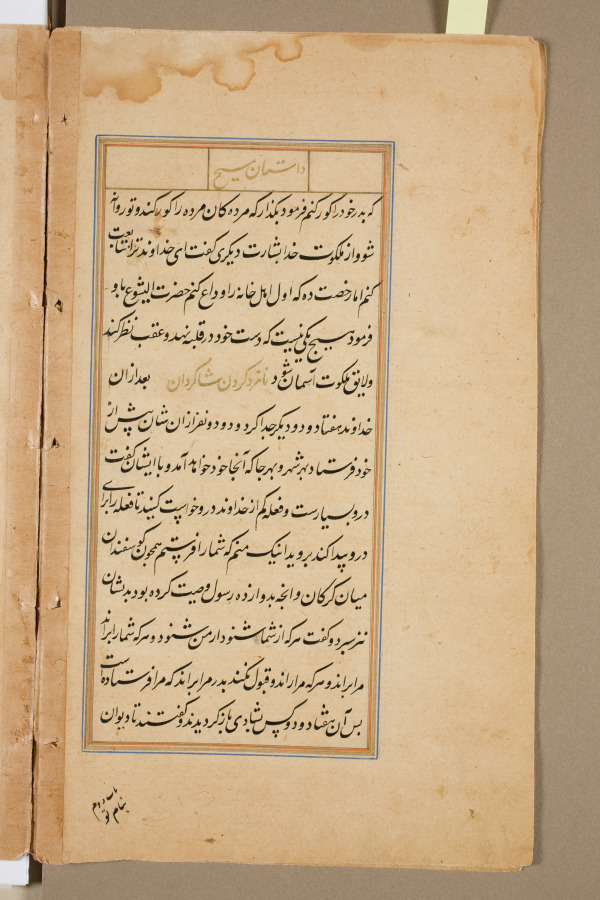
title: Text page from a Mirror of Holiness (Mir’at al-quds) of Father Jerome Xavier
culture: Mughal India, Allahabad, made for Prince Salim (1569–1627)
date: 1602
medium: Ink and gold on paper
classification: Manuscript